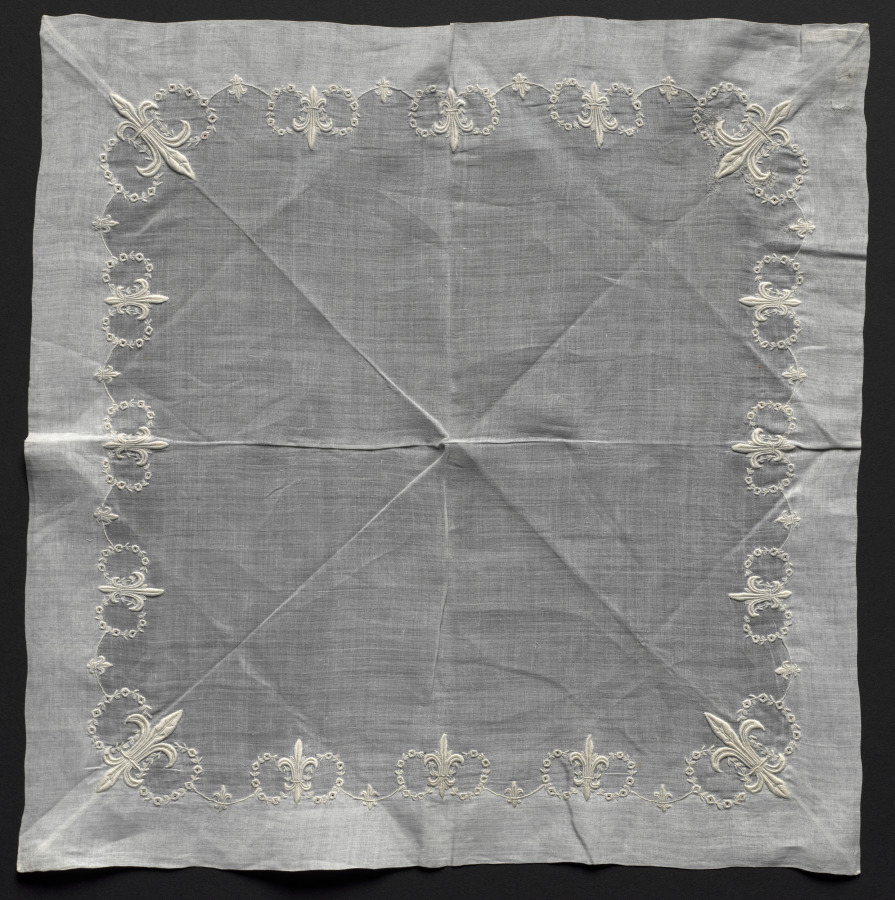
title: Handkerchief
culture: France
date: 1800s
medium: Plain weave linen: embroidered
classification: Embroidery